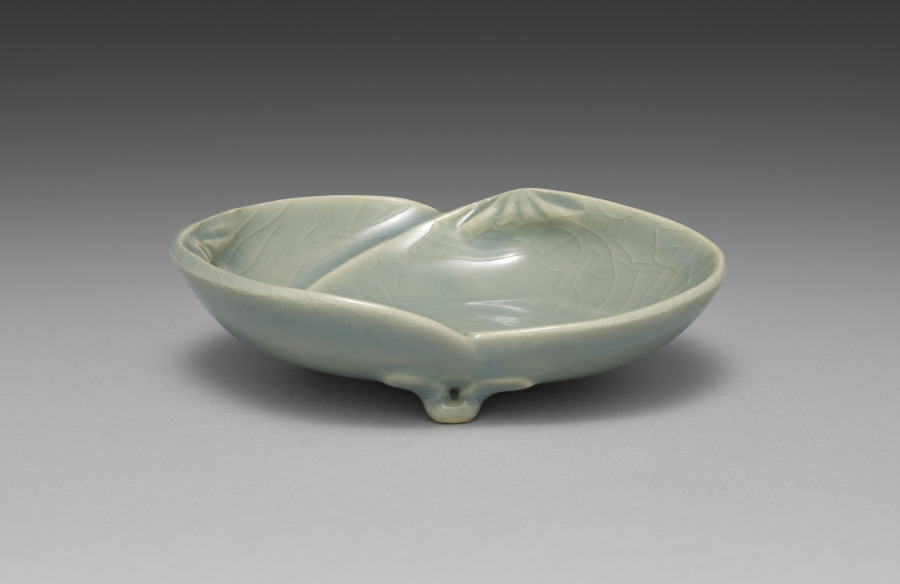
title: Dish from Saucers with Matching Shells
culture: Japan, Meiji period (1868–1912)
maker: Seifū Yohei III (Japanese, 1851–1914)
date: 1893–1914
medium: Porcelain with molded design and green crackled glaze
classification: Ceramic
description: Yohei III’s main output for his sophisticated clientele was in the form of tea sets and dining sets. He created a range of dishes in green glazes. He often produced in pairs, sets of five, or sets of ten. The set of five dishes with a more complex form is described as having a “water-colored glaze” (mizuiroyū). These are shaped like clam half shells, a reference to a game in which shell halves painted with narrative scenes or a variety of motifs must be matched back together by the players. The dishes have molded details to articulate the shell forms, and the crackling across each shell adds another dimension to the surface. Each dish is set on three small feet, formed by a pinched piece of clay and attached to an unglazed area on the underside of the dish. Curiously, while four of the dishes are stamped with the artist’s mark, one has instead a signature carved into the base.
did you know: Each of the paired-shell dishes has its own compartment in a long, flat box.